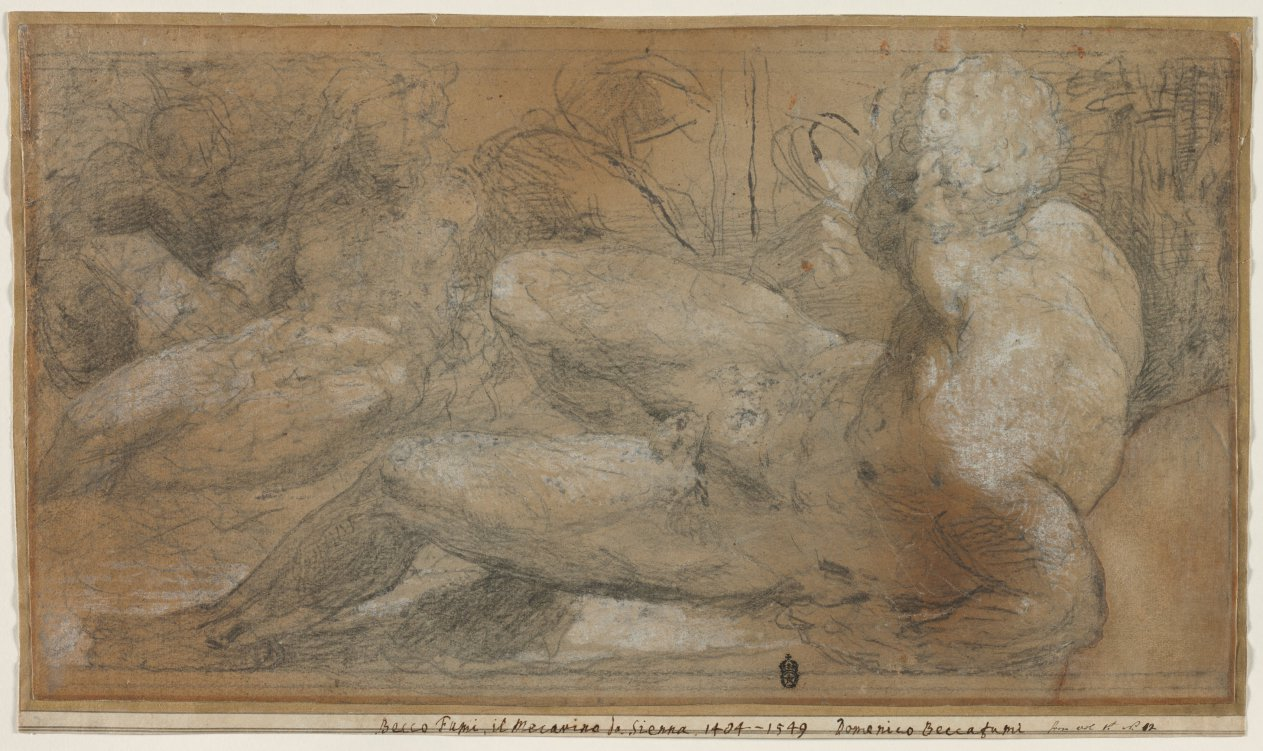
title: Three Male Nudes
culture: Italy, 16th century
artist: Domenico Beccafumi (Italian, 1486–1551)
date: c. 1540–47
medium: black chalk or charcoal with brush and black chalk or charcoal wash, heightened with white gouache; incised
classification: Drawing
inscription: tertiary support, along bottom, in brown ink: Becco Fumi, il Mecarino da Siena. 1404-1549 Domenico Beccafumi; lower right, in brown ink: from vol 1.st P. [1?]2.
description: Domenico Beccafumi was intensely aware of the work of his contemporary Michelangelo when he developed his own style for projects in Siena, south of Florence. This drawing is a study for a chiaroscuro print, a type of woodblock print using several blocks, some colored, to create light and shadow. The drawing features three male nudes whose roles are unknown. The closest figure, reclining with his back toward the viewer, recalls ancient sculptures of river gods as well as works by Michelangelo, including the reclining figures he sculpted for the Medici tombs in Florence.